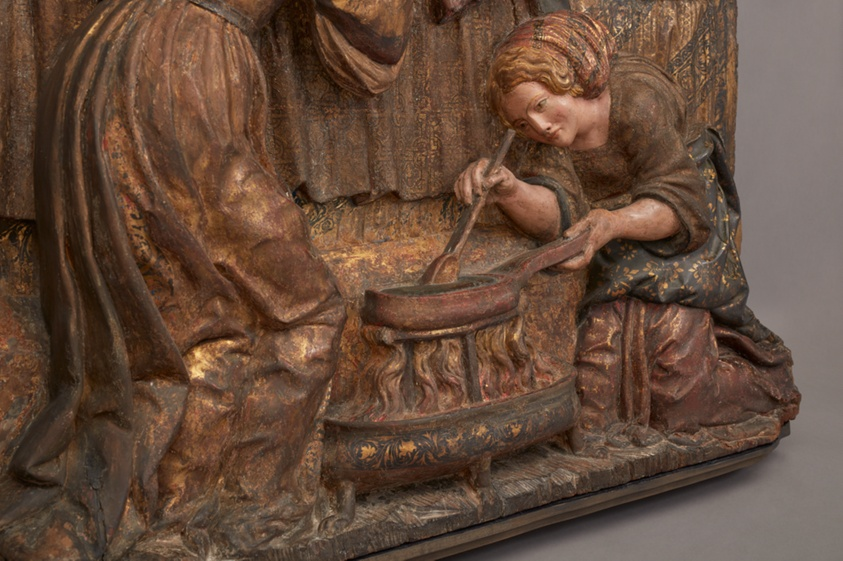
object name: Sculpture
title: The Birth of Saint John the Baptist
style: sixteenth century, 16th Century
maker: Artist unknown (Spanish (Burgos), active 16th century)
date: c. 1525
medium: Wood, polychromy, and gilding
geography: Spain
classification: relief; sculpture; sculpture/wood; spanish; wood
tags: religious scenes, bed, fire, women, woman, babies, birth, Christianity, Christian subjects, Saint John the Baptist, saints, religious figures, religious, religion